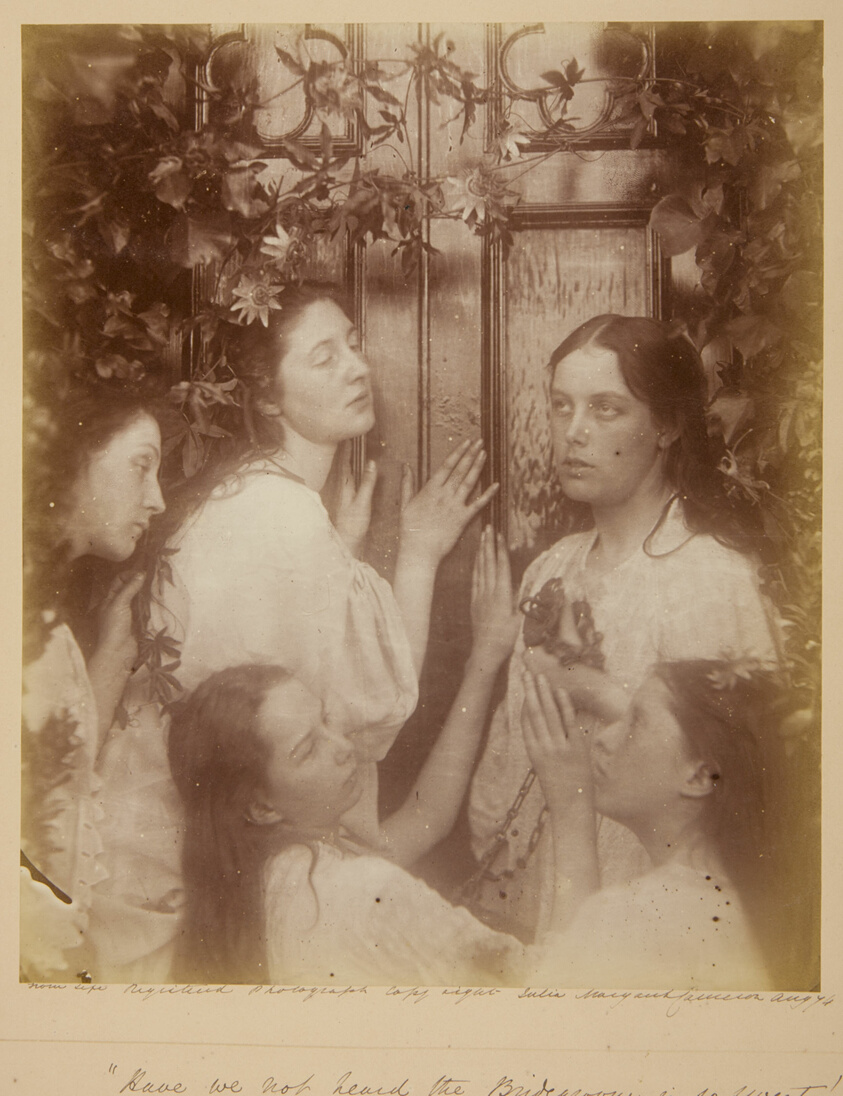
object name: Photograph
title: Have we not Heard the Bridegroom is so Sweet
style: 19th century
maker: Julia Margaret Cameron (English, 1815–1879)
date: August 1874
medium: Albumen print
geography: England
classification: albumen silver print; photographic process; photography; photograph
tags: portraits, portraits: female subject, photography, portraits: multiple subjects